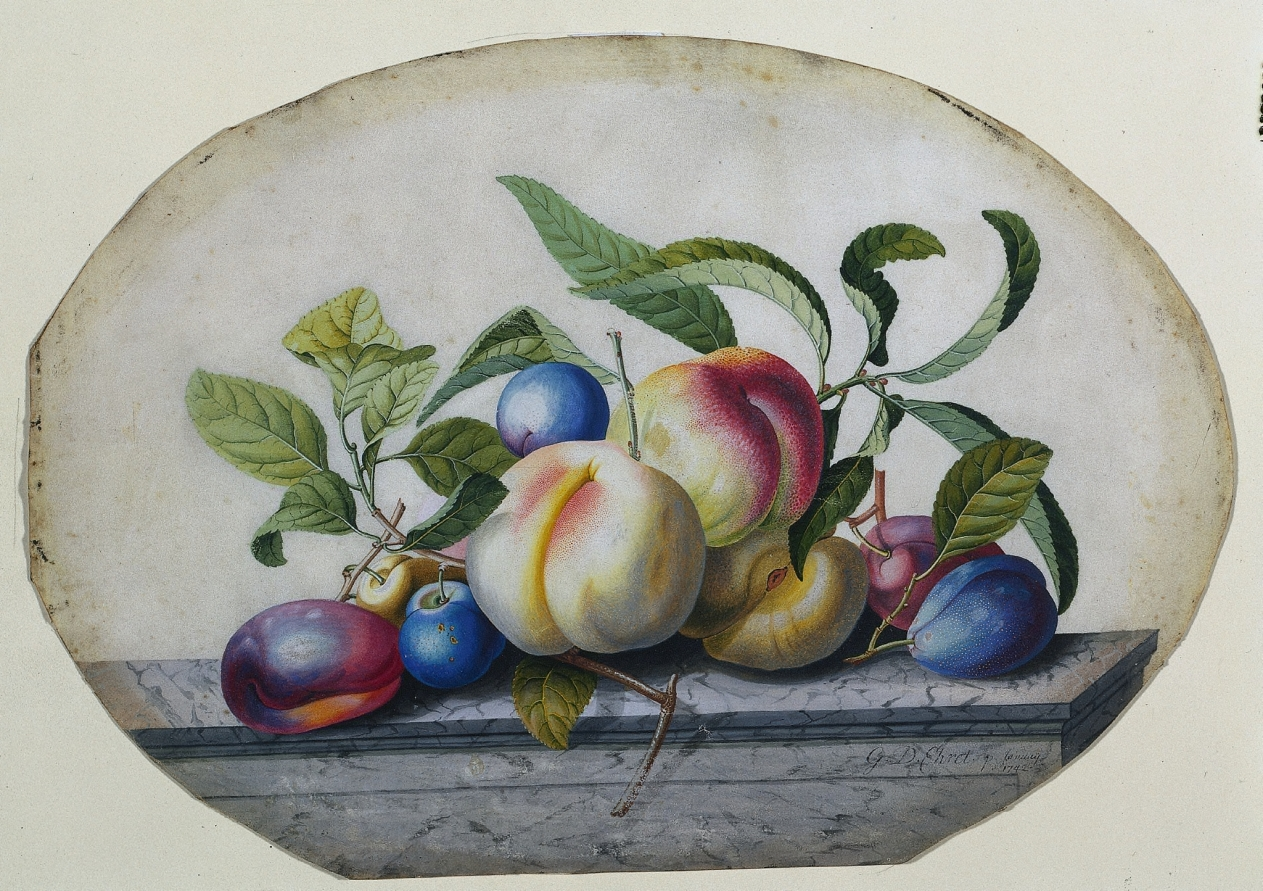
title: Fruit Arrangement: Peaches and Plumbs on a Slab of Marble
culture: Germany, 18th century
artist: Georg Dionysius Ehret (German, 1708–1770)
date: 1742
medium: watercolor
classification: Drawing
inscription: Dated January 1742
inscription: Signed lower right